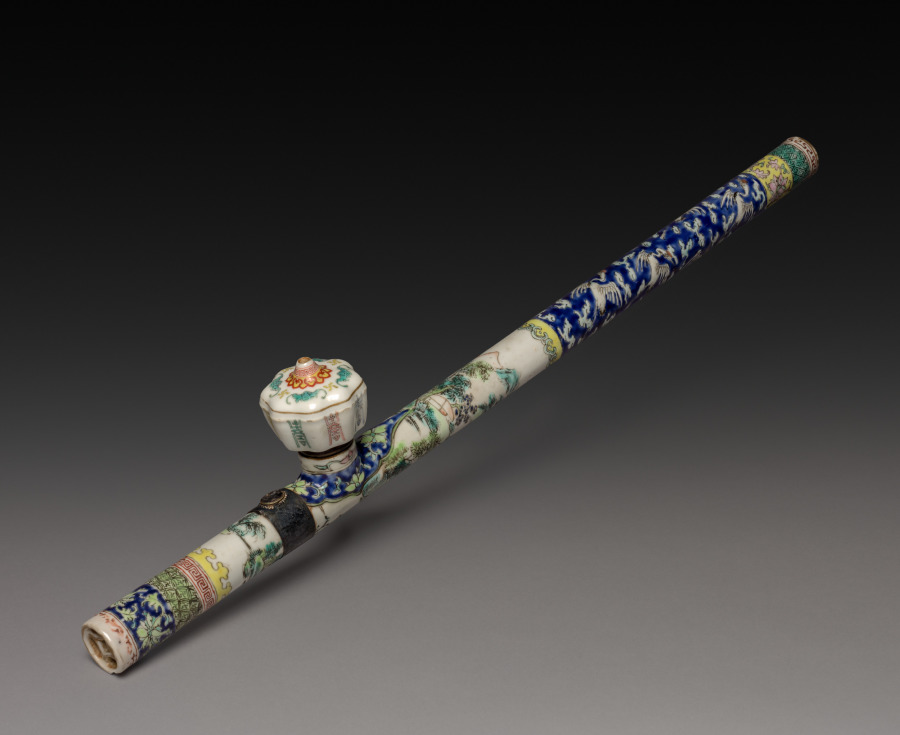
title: Pipe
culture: China, Qing dynasty (1644-1911)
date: 1644–1911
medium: famille verte porcelain with blue overglaze enamel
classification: Miscellaneous